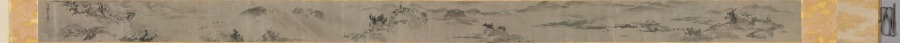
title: Eight Views of Xiao-Xiang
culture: Japan, Muromachi period (1392–1573)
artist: Sesson Shūkei (Japanese, c. 1492–c. 1577)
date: 1500s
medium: handscroll; ink on paper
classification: Painting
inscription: Signature and seal of artist at end of painting.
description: Eight Views of the Xiao and Xiang Rivers can be traced to 11th-century Chinese poems and paintings, the depiction of which had also become popular among Korean and Japanese painters. Xiao-Xiang refers to the region in present-day Hunan province where the Xiao and Xiang rivers converge. Few painters of the Eight Views had in fact seen the scenery; rather, they were trying to portray in ink and wash the lyrical qualities of dim light and a misty atmosphere typical of that region. Each of the poetic titles suggests a time of day, a season, or specific atmospheric conditions—subjects that challenged the abilities of the most talented artists. In this miniature painting (shukuzu) of the Muromachi period, Japanese Zen monk and painter Shukei Sesson depicted all eight views featured in Chinese prototypes: Wild Geese Descending to Sandbar; Returning Sails Off a Distant Coast; Mountain Market in Clearing Mist; River and Sky in Evening Snow; Autumn Moon over Dongting Lake; Night Rain on the Xiao and Xiang; Evening Bell from Mist-Shrouded Temple; and Fishing Village in Evening Glow.